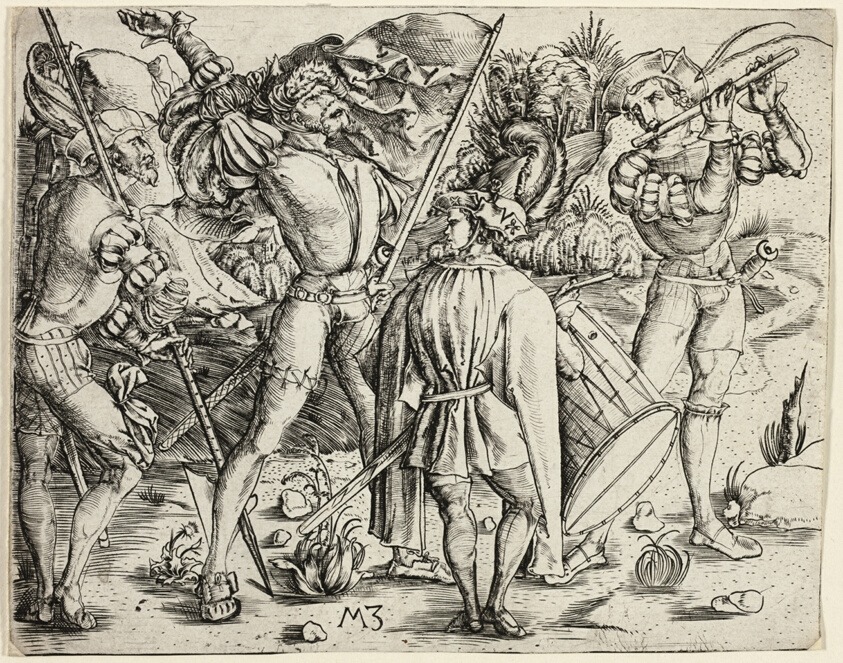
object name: Print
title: The Warriors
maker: Master M.Z.; German, active 1500-1550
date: c. 1500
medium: Engraving in black on ivory laid paper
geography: Germany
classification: engraving; print; prints and drawing